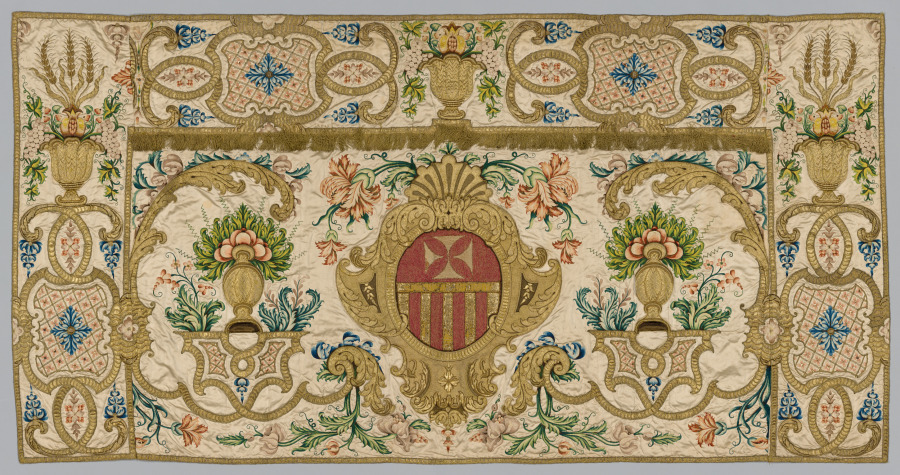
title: Embroidered Front of an Altar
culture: Italy or Spain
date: 1600s–1700s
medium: Satin and silk: embroidery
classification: Embroidery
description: This spectacular cloth with raised three-dimensional embroidery embellished the front of an altar. Lavishly applied gilt-metal thread creates architectural embellishments enhanced by grand vases displaying sheaves of wheat in the upper corners and bunches of grapes in the center of the fringed over-frontal, referring to the bread and wine of the Mass. The central coat of arms represents the Order of the Blessed Virgin Mary of Mercy, a Roman Catholic mendicant order established in 1218 by Saint Peter Nolasco in the city of Barcelona, Spain, then in the principality of Catalonia (crown of Aragon).